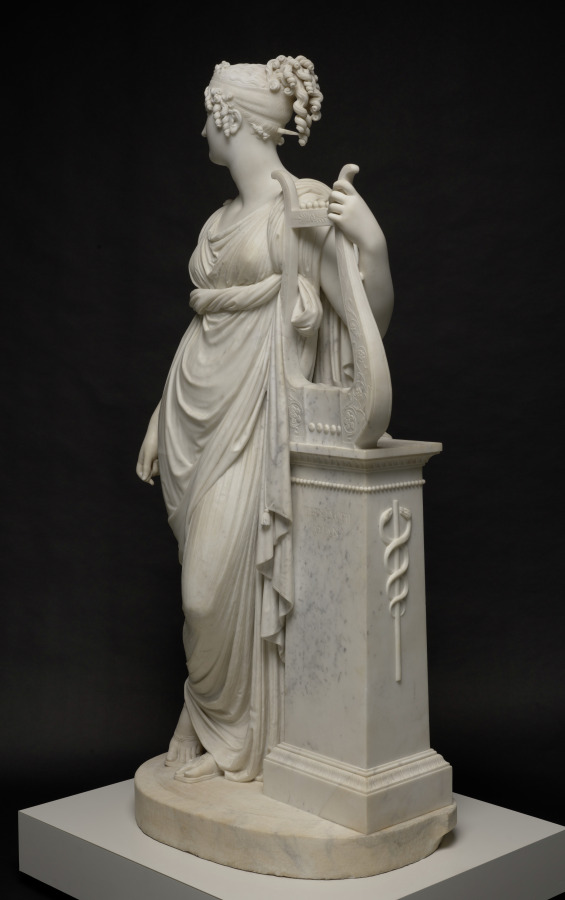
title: Terpsichore Lyran (Muse of Lyric Poetry)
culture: Italy, 19th century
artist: Antonio Canova (Italian, 1757–1822)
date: 1816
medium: marble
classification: Sculpture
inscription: inscribed on front of column: "Terpsichore Lyran" [Terpsichore as the Muse of lyric poetry]; inscribed at base of column: "Canova Fact: 1816"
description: In Greek mythology, Terpsichore was one of the nine Muses, or goddesses of creative inspiration. The lyre, the Greek inscription on the short column, and the caduceus (entwined snakes) on the side identify the figure as Terpsichore Lyran, muse of lyric poetry. This sculpture began with a commission from Napoleon's brother, Lucien, for an idealized portrait of his wife, Alexandrine. Antonio Canova made this version for a British aristocrat and exhibited it in 1817 at the Royal Academy in London to great acclaim.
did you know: Trained by his grandfather, an Italian stonemason, Canova began modeling clay and carving marble sculptures before age ten.